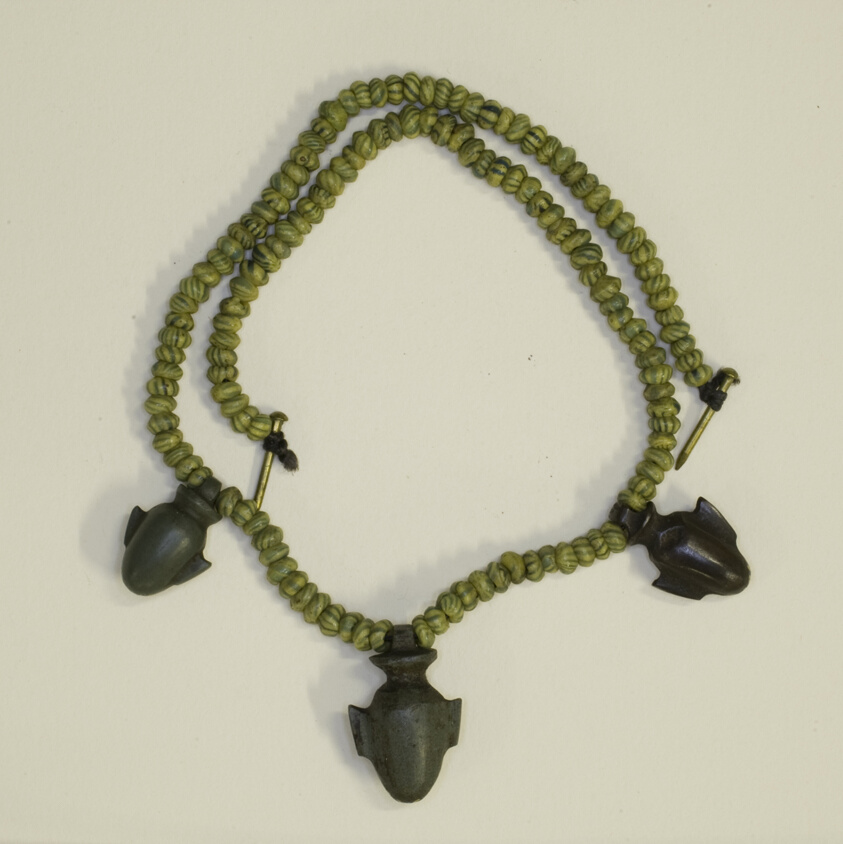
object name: Costume and Accessories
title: Amulet of a Heart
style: late period (egyptian), egyptian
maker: Egyptian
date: Late Period, Dynasty 26–31 (664–332 BCE)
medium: Stone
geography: Egypt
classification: amulet; jewelry; ancient art; bead; costume